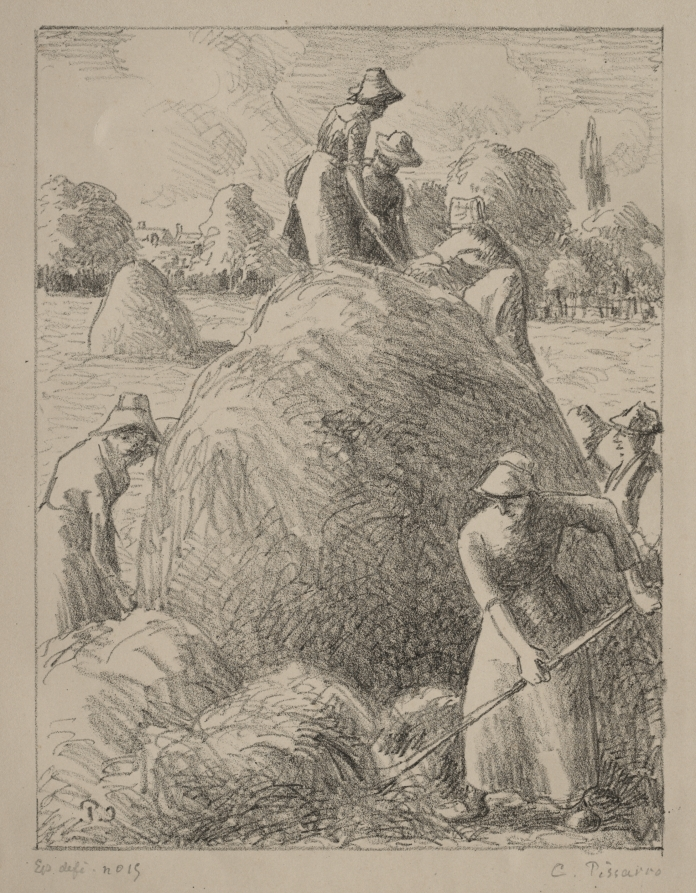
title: Haymakers of Eragny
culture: France, 19th century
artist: Camille Pissarro (French, 1830–1903)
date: c. 1896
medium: Zinc lithograph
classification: Print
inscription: Signed, lower left, in plate: C.P. [reversed]; inscribed, lower left margin, in graphite: Ep. defi. no 15 / faneuses d'Eragny; signed, lower right margin, in graphite: C. Pissarro